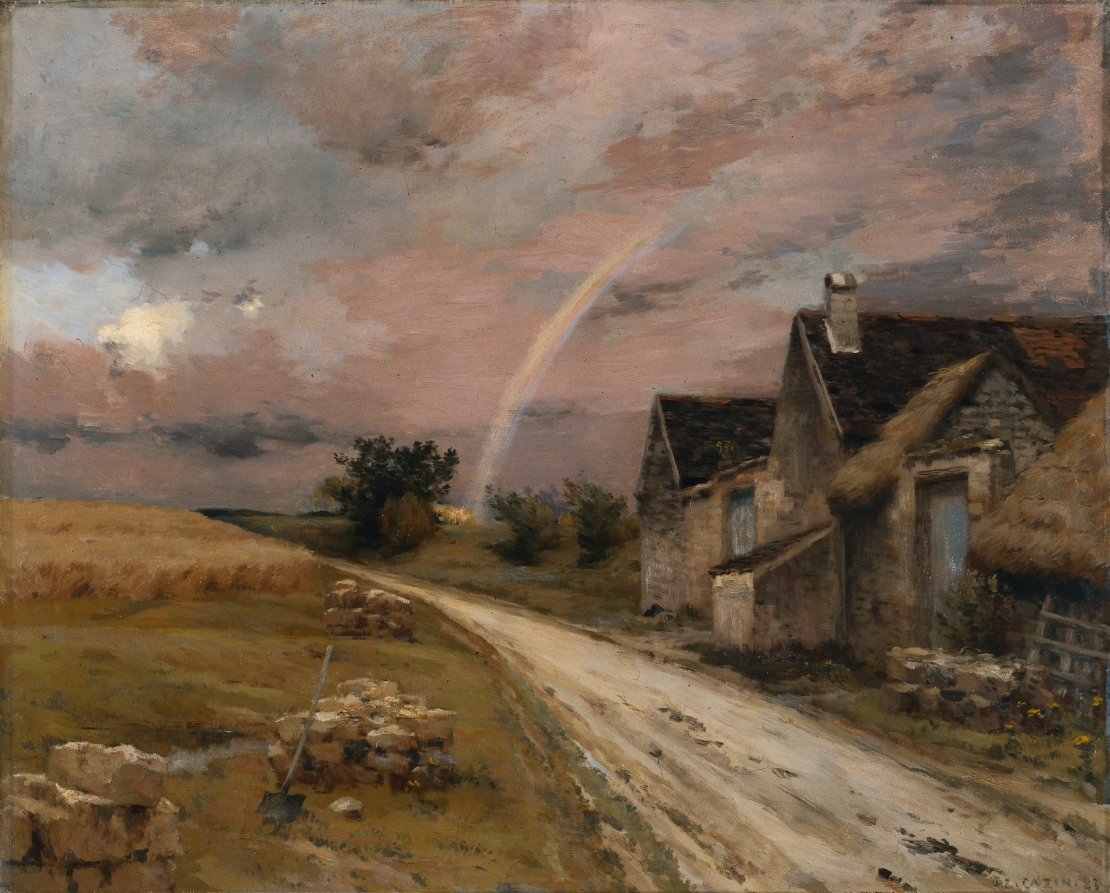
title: The Rainbow, Achères la Forêt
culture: France, 19th century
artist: Jean-Charles Cazin (French, 1841–1901)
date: 1883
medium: oil on fabric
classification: Painting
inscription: Signed lower right in brown paint: J. C. Cazin .83